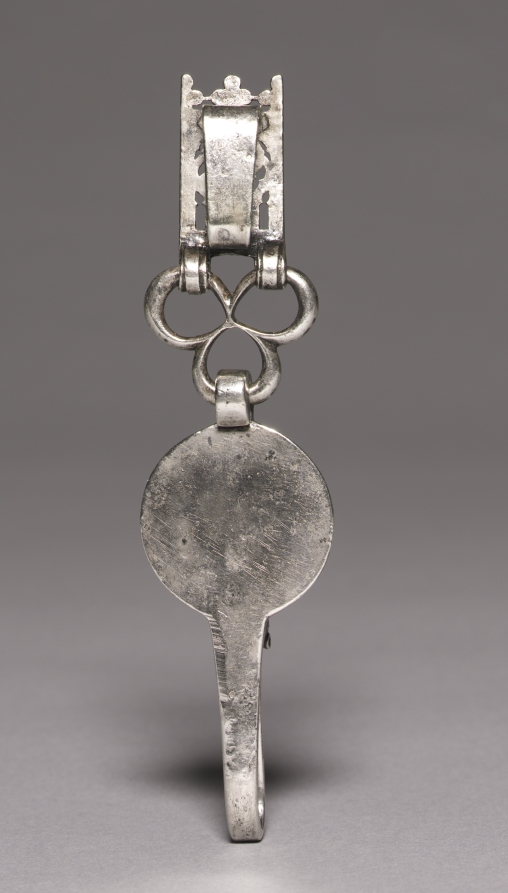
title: Clavendier (Belt Hook)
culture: Netherlands, Gothic period, late 14th century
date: c. 1400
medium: silver, gilded silver, champlevé enamel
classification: Metalwork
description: This object allowed a purse (carried by both sexes) or keys to be suspended from the belt. It bears the enameled coat of arms of the family of Zuylen (van) d’Anholt.